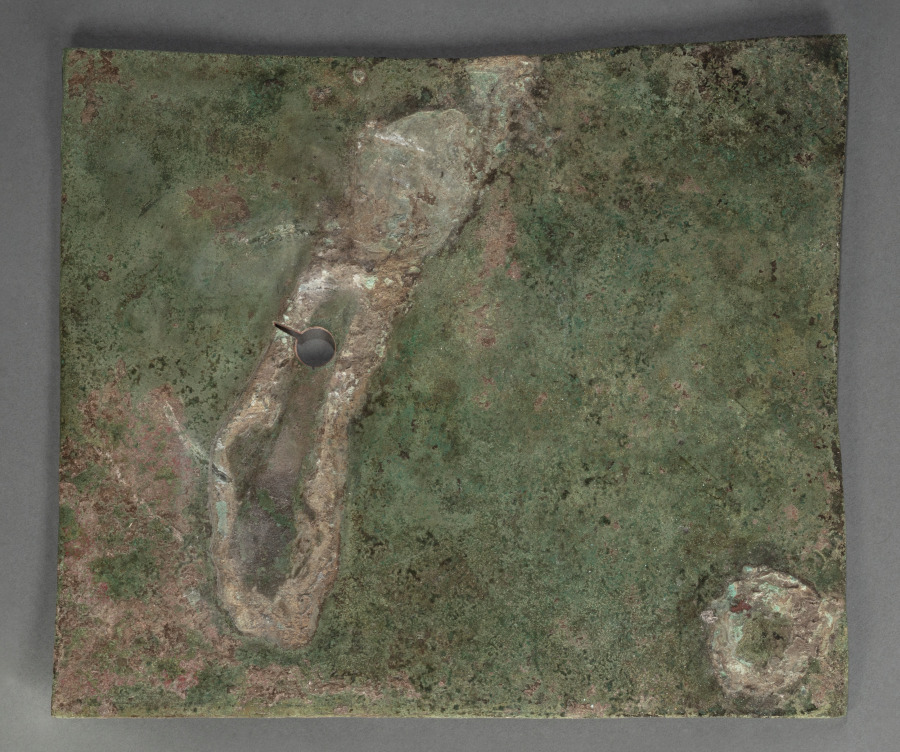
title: Baseplate for the Cleveland Apollo: Apollo Sauroktonos (Lizard-Slayer) or Apollo the Python-Slayer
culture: Greece, Athens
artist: possibly by Praxiteles (Greek, Athenian, c. 400–330 BCE)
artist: or Follower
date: c. 350–200 BCE, or possibly later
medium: bronze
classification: Sculpture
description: The baseplate is nearly square in shape, but two edges are noticeably concave. A modern hole facilitates mounting (with a modern rod in the right leg), and marks show the placement of both feet, once attached with lead solder. A nearly circular lead solder mark located at the front left corner likely corresponds to the placement of a small tree, now lost.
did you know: Most large-scale ancient bronze sculptures stood on bases made of stone rather than bronze.